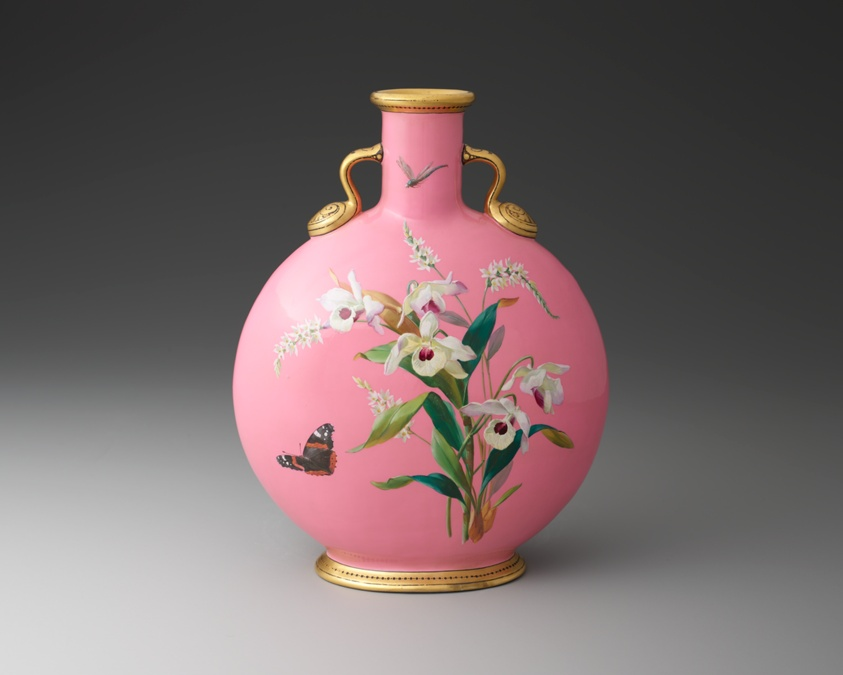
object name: Ceramics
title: Moon Flask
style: Aestheticism, 19th century, Aesthetic Movement, english, Japanism, japonism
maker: Minton (Stoke-on-Trent, England, founded 1793)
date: c. 1875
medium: Bone china, enamel, and gilding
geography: Stoke-on-Trent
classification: ceramics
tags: vase, moon